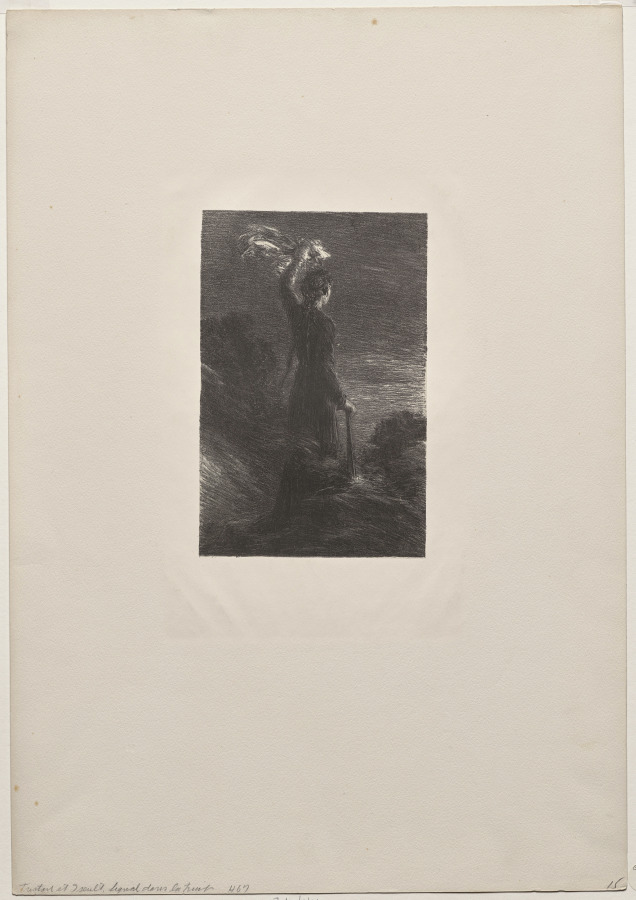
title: Tristan and Isolde, Act II: Signal in the Night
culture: France, 19th century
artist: Henri Fantin-Latour (French, 1836–1904)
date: c. 1886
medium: lithograph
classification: Print